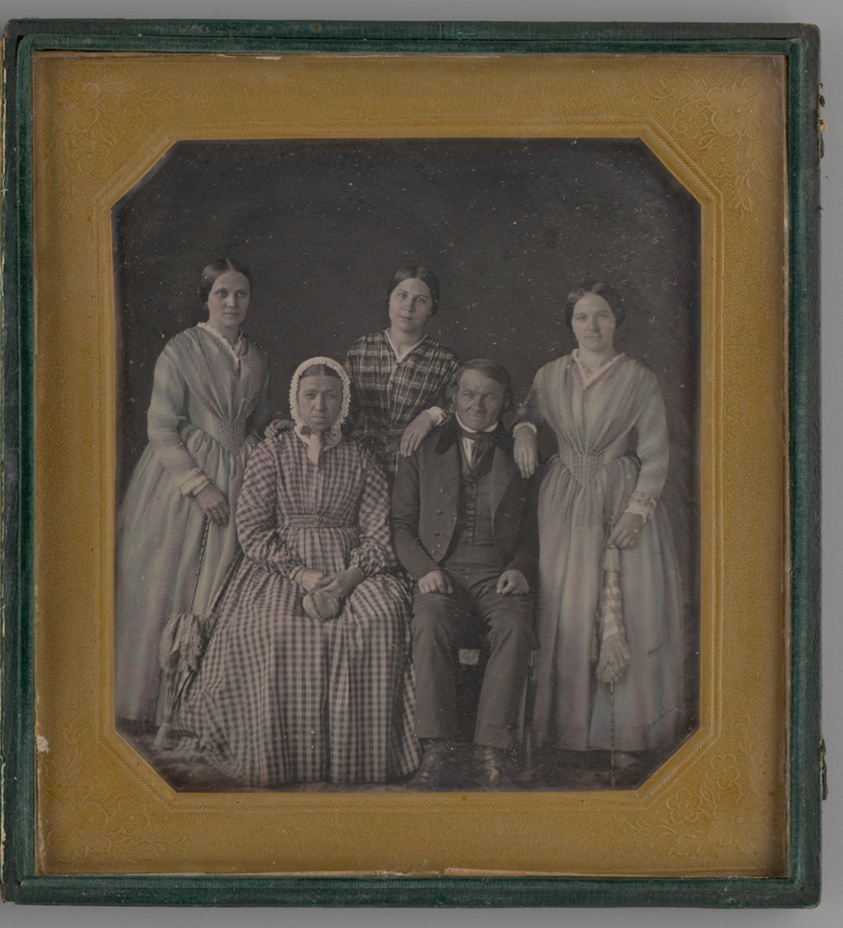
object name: Photograph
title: Untitled (Portrait of David and Christianna Palmer with daughters Sophia Magdalena, Christianna, and Regina A. Frederick)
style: 19th century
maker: attributed to William Langenheim; American, born Germany, 1807-1874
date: 1847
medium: Daguerreotype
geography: United States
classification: portrait; photograph; photographic process; photography; portrait; daguerreotype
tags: lundberg collection, portraits: multiple subjects, portrait, family, families, portraits